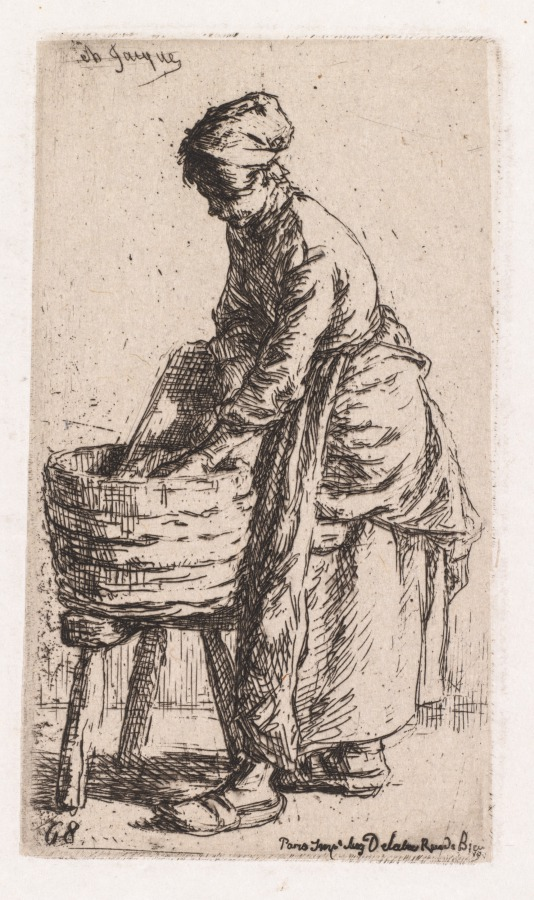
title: Washerwoman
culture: France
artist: Charles-Émile Jacque (French, 1813–1894)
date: 1850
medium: Etching and drypoint on chine collé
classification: Print